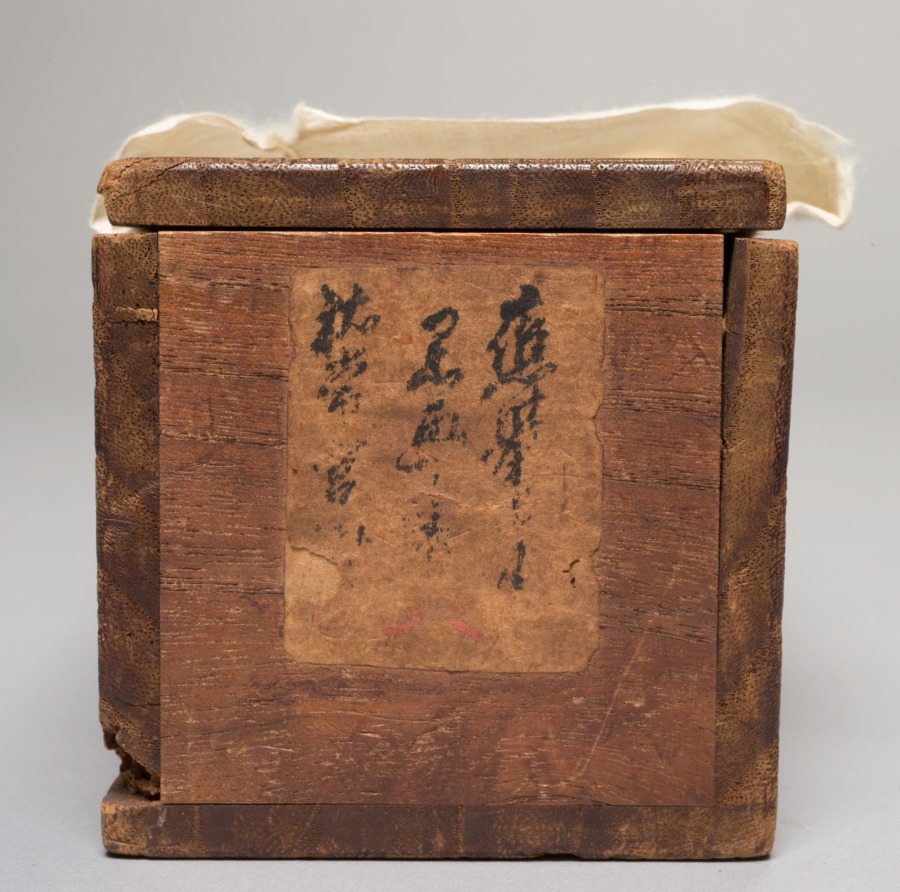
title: Tiger in Wind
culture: Japan, Edo period (1615–1868) to Meiji period (1868–1912)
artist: after Maruyama Ōkyo (Japanese, 1733–1795)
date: 1800s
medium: hanging scroll; ink on paper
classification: Painting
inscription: 「秋空一鶴」賛 長嘯一聲風括地「月渚」朱文方印「祐常之章」白文方印 壬辰初冬寫応挙 「應舉之印」白文方印・「仲選」白文方印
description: The seals appended to the inscription on this painting suggest that the text was brushed by Yūjō (1723–1773), an imperial prince who became a Buddhist monk and was abbot of Enman'in at Miidera. The line is from a poem attributed to a Yuan dynasty poet, Yu Ruyu (dates unknown), and describes the sound of a fierce wind lashing the ground. Wind is associated with the roar of the tiger. Yūjō was Maruyama Ōkyo's most important patron as a young artist, and this painting has a signature asserting that Ōkyo created it in 1772, the year before Yūjō's death. While Yūjō produced a preface for a now famous set of handscrolls he commissioned Ōkyo to paint, and a number of Ōkyo's compositions for Enman'in survive, this work would appear to be one imagining their relationship, as opposed to a genuine piece.